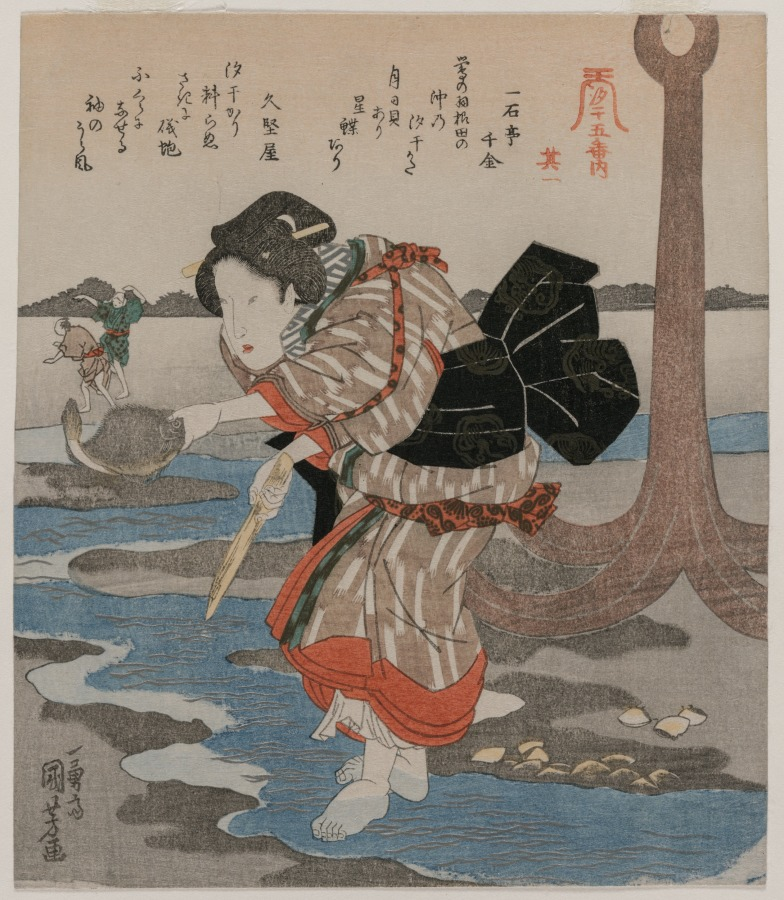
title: First Print from A Low Tide Pentaptych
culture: Japan, Edo period (1615–1868)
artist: Utagawa Kuniyoshi (Japanese, 1797–1861)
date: c. 1830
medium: color woodblock print from a pentaptych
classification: Print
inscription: Signature: Ichiyusai Kuniyoshi ga.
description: This is one of five surimono, privately commissioned prints, making up an image of people collecting sea life at low tide. Ten witty poems, written by members of a poetry circle, appear across the upper part of the composition, with two poems on each print. Based in Edo (now Tokyo), the group was led by Hisakataya Misora (active 1810s–30s), who wrote four of the poems. This composition may have been printed in April, which was considered the best time for beachcombing.